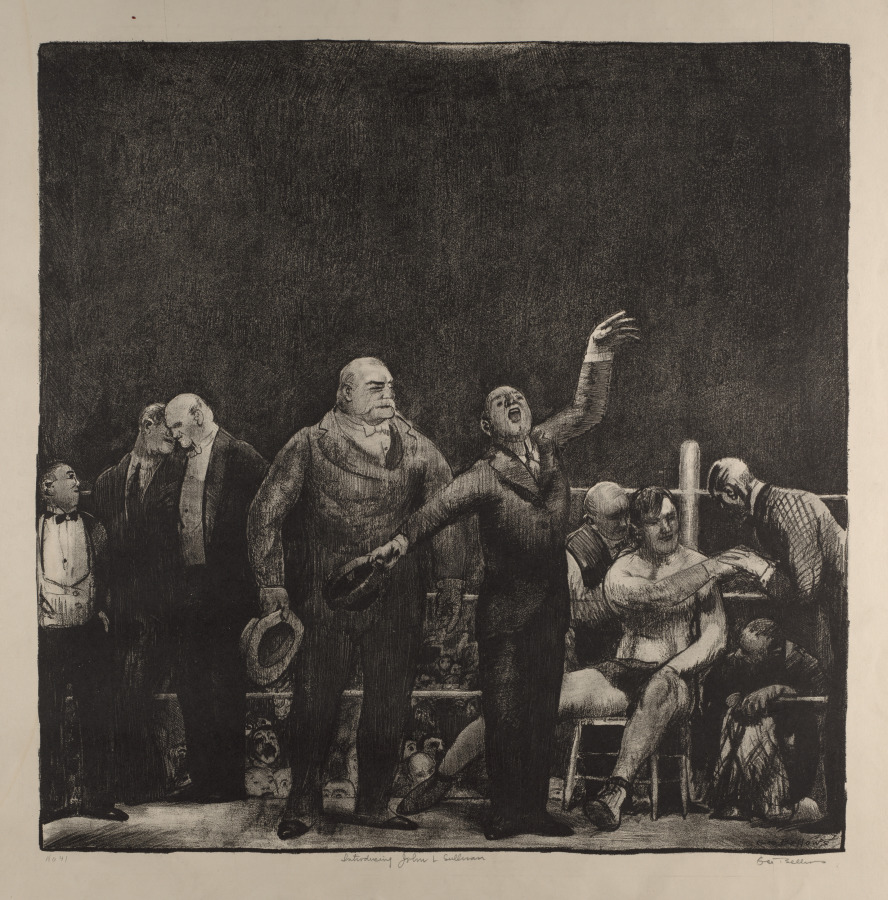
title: Introducing John L. Sullivan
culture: America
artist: George Bellows (American, 1882–1925)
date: 1916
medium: lithograph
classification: Print